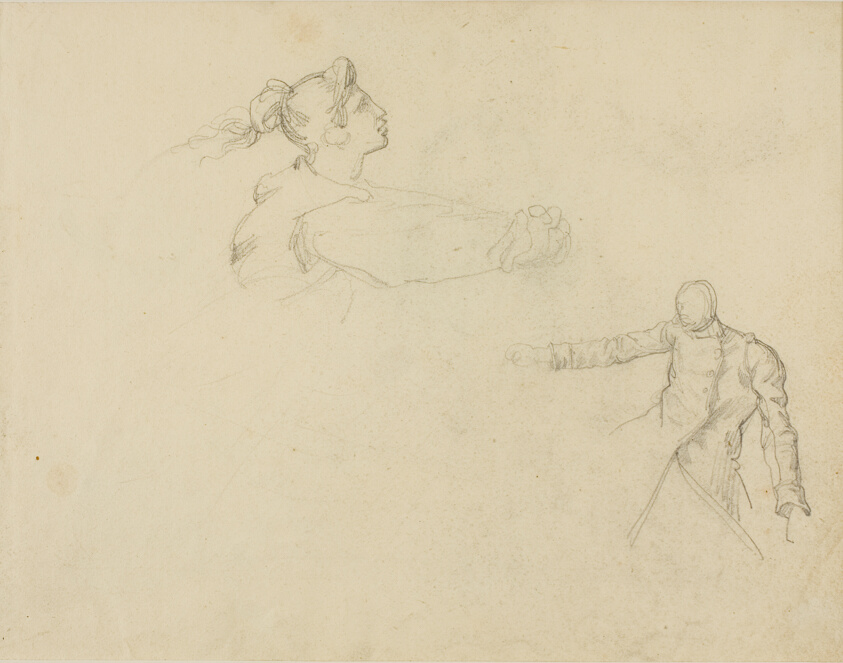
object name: Drawing and Watercolor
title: Studies of a Woman and a Soldier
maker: Jean Louis André Théodore Géricault (French, 1791-1824); or Horace Vernet (French, 1789-1863)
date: 1818/19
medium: Graphite on cream wove paper, perimeter mounted on cream wove paper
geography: France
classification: drawings (visual works); prints and drawing